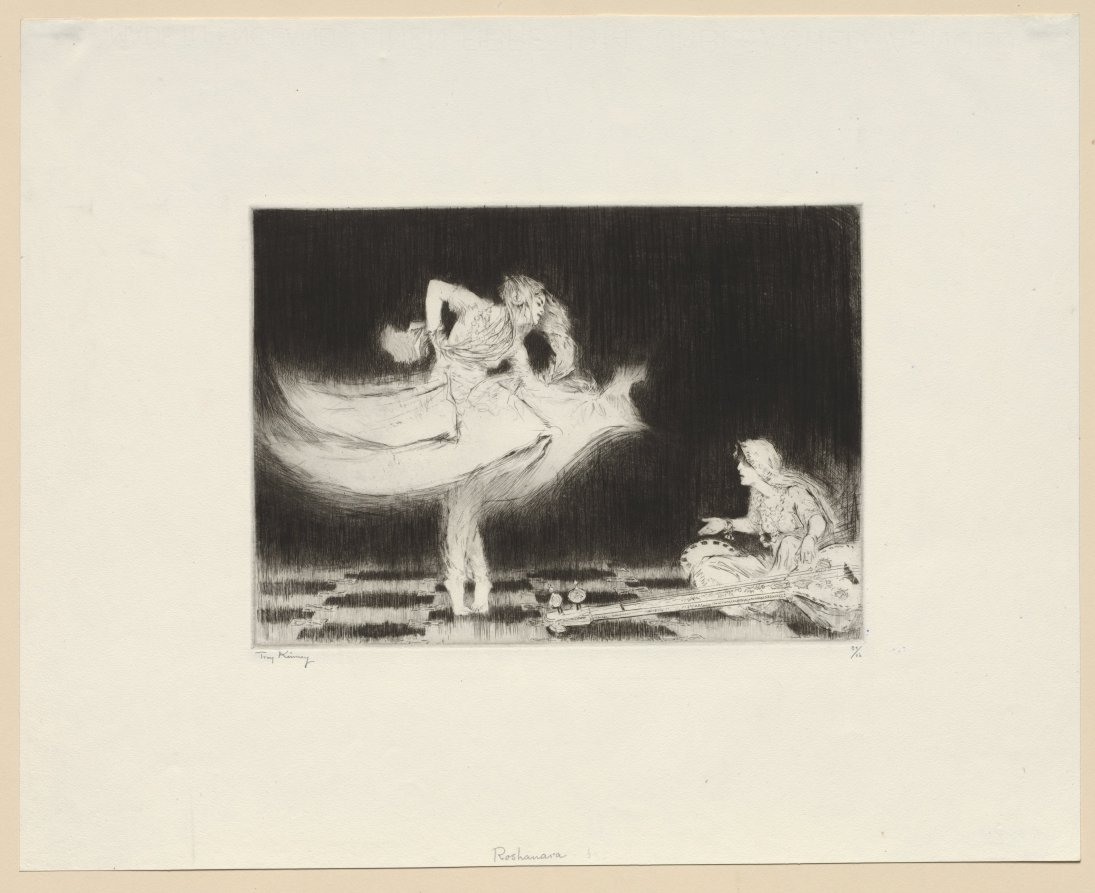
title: Roshanara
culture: America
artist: Troy Kinney (American, 1871–1938)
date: c. 1918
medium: etching and drypoint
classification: Print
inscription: Signed in pencil on bottom left beneath image: Troy Kinney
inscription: Marked in pencil on bottom right beneath image: 39/50